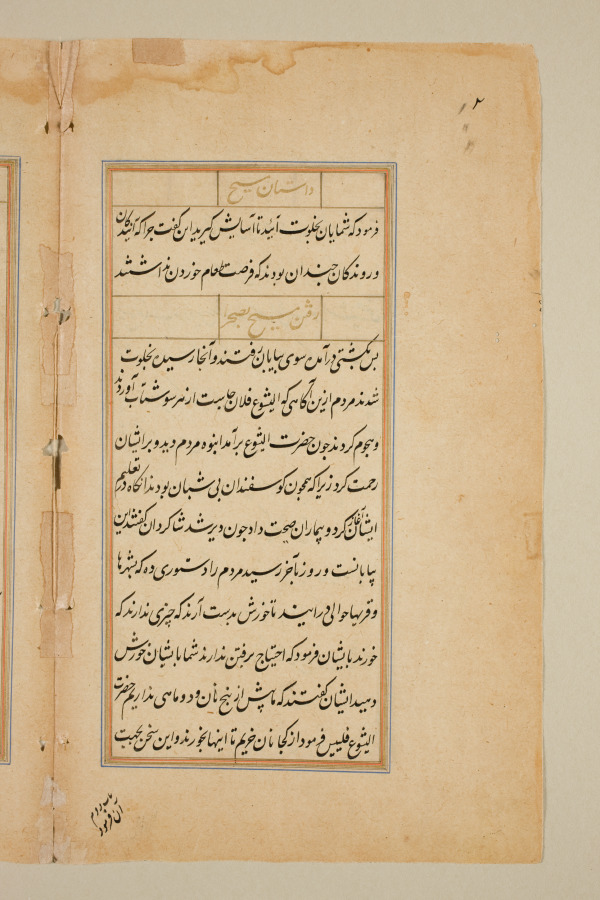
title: Text page from a Mirror of Holiness (Mir’at al-quds) of Father Jerome Xavier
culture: Mughal India, Allahabad, made for Prince Salim (1569–1627)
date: 1602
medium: Ink and gold on paper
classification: Manuscript